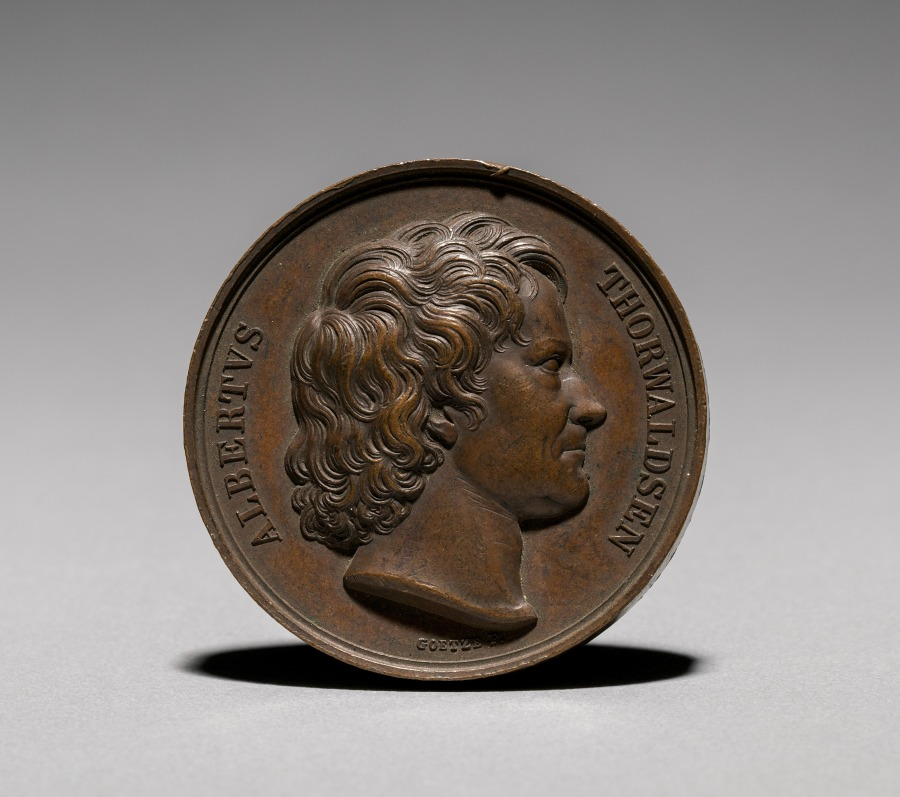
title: Medal: Albert Bertel Thorvaldsen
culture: Germany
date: 1828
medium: bronze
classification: Metalwork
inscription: "ALBERTVS THORWALDSEN"; signed: "F. Goetze."